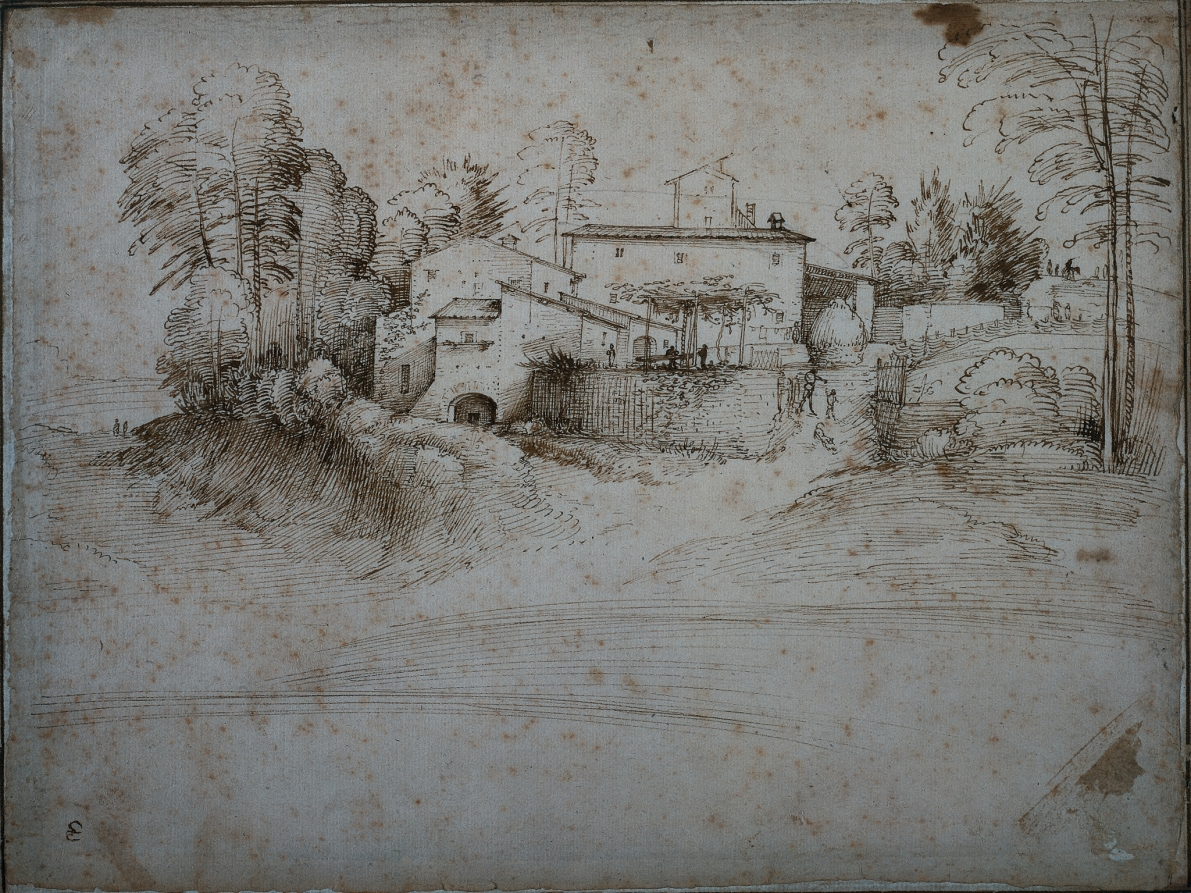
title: Farmhouse on the Slope of a Hill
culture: Italy, Florence, 15th century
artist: Fra Bartolommeo (Italian, 1472–1517)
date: c. 1508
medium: pen and brown ink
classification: Drawing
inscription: a bird in ink lower left recto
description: This is a significant early example of pure landscape drawing in Europe, as it is dedicated completely to the depiction of nature for its own sake, without suggestion of a biblical or historical narrative. The rapidity and regularity of strokes used for the evergreen and deciduous trees and the sweeping lines in the foreground suggest that the landscape in Farmhouse on the Slope of a Hill was made directly from nature. The sheet comes from an album of 41 landscape studies by Fra Bartolommeo assembled by an eighteenth-century collector and disbound for sale in the mid-20th century. A member of the Dominican Order, Fra Bartolomeo likely produced these drawings during his travels in and around Florence, often to Dominican establishments.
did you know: The artist who made this drawing, Fra (brother) Bartolommeo, left his successful Florentine artistic studio in 1500 and renounced painting in order to join the Dominican Order.